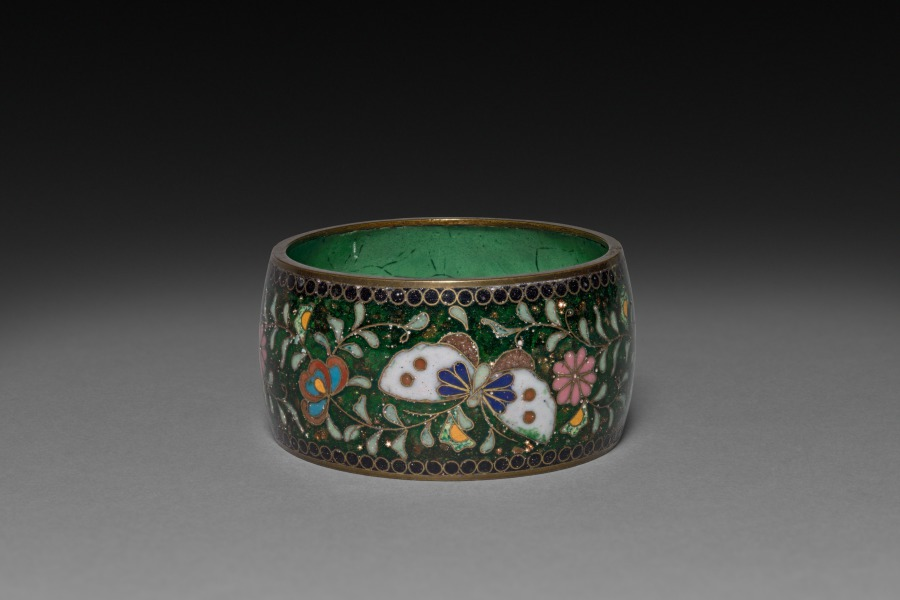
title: Napkin Ring with Butterflies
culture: Japan, Meiji period (1868–1912) or Taishō period (1912–26)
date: early 1900s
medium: cloisonne enamel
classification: Enamel